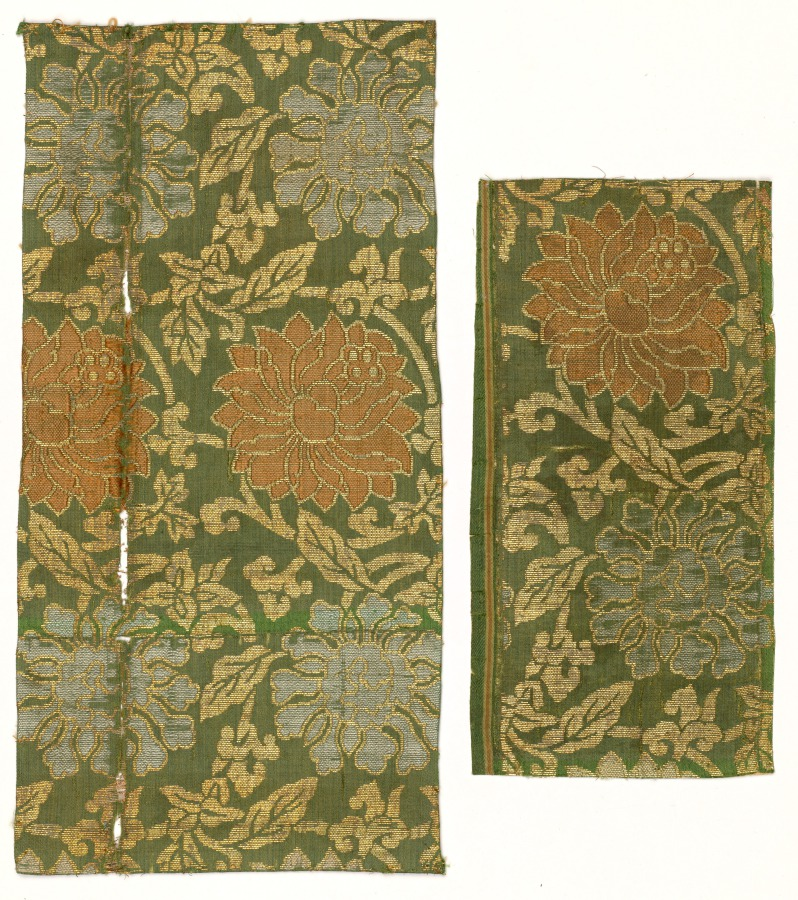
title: Textile Fragments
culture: Japan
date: 1800s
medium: silk, metallic thread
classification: Textile